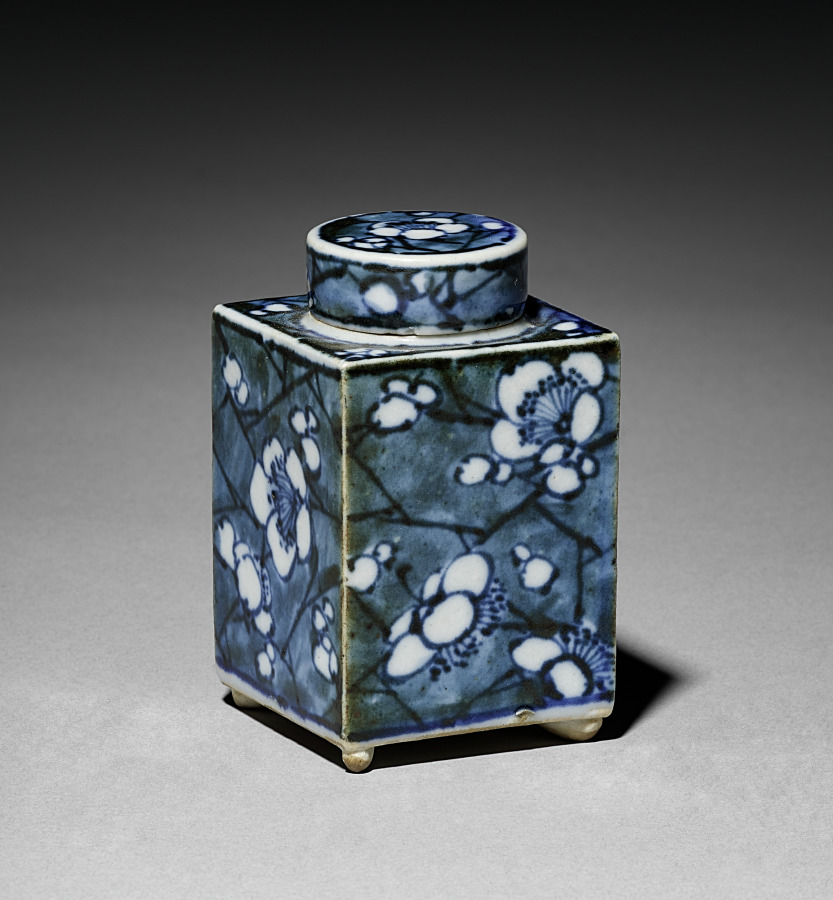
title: Tea Container with Plum Blossoms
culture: Japan, Edo period (1615–1868)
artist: Aoki Mokubei (Japanese, 1767–1833)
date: early 1800s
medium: porcelain with underglaze blue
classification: Ceramic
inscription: signed "Ro Mokubei" on base in underglaze blue.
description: Aoki Mokubei, born into a family of restaurateurs, was a potter, calligrapher, painter, and scholar, and is considered one of the three masters of later Edo period Kyoto ceramics. He specialized in porcelains fashioned after Chinese prototypes, and created works for steeped tea (sencha) such as these matching tea caddies decorated in an underglaze blue called sometsuke—literally “with applied dye.” He signed them on their bottoms. They also have intricately patterned silk sleeves to both beautify and protect them. On the exterior of the lid of the outer wooden box that contains them, it is written that Mokubei inscribed and painted an image on the box. On the interior of the lid, the signature and seals of a former owner are written. Mokubei has signed the lid of the inner box, and a charming ink and light color composition of West Lake in Hangzhou in China covers its three sides. On the fourth side is a long inscription by Mokubei describing the scene.